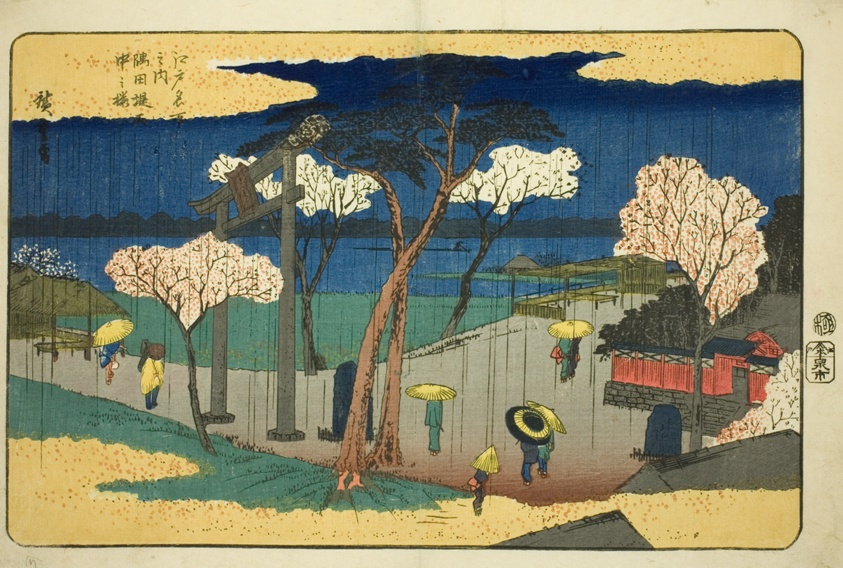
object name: Print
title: Cherry Blossoms in Rain at the Sumida Embankment (Sumida zutsumi uchu no sakura), from the series "Famous Places in Edo (Edo meisho no uchi)"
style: Japanese (culture or style)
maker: Utagawa Hiroshige 歌川 広重; Japanese, 1797-1858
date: c. 1832/34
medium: Color woodblock print; oban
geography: Japan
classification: woodblock print; print; asian art